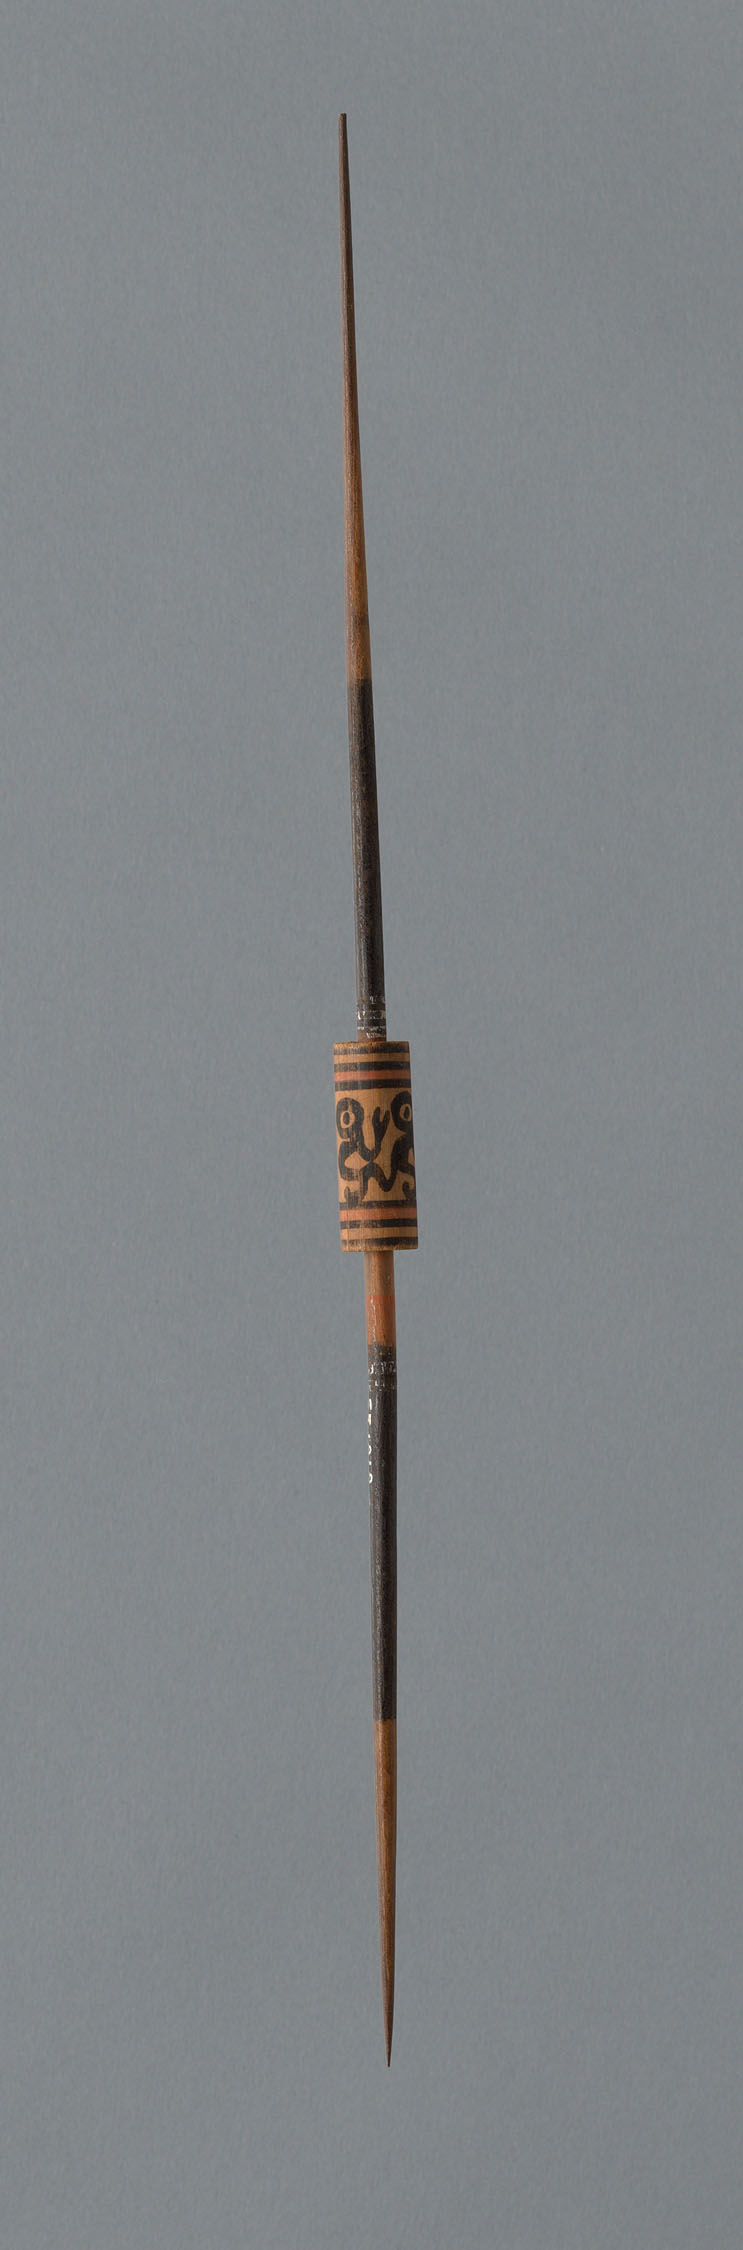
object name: non-art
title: Wooden Spindle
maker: Peru, Possibly central coast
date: 1000/1476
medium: Wood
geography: Peru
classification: spindles (textile working equipment); textile working equipment; accessories (object genre); textile